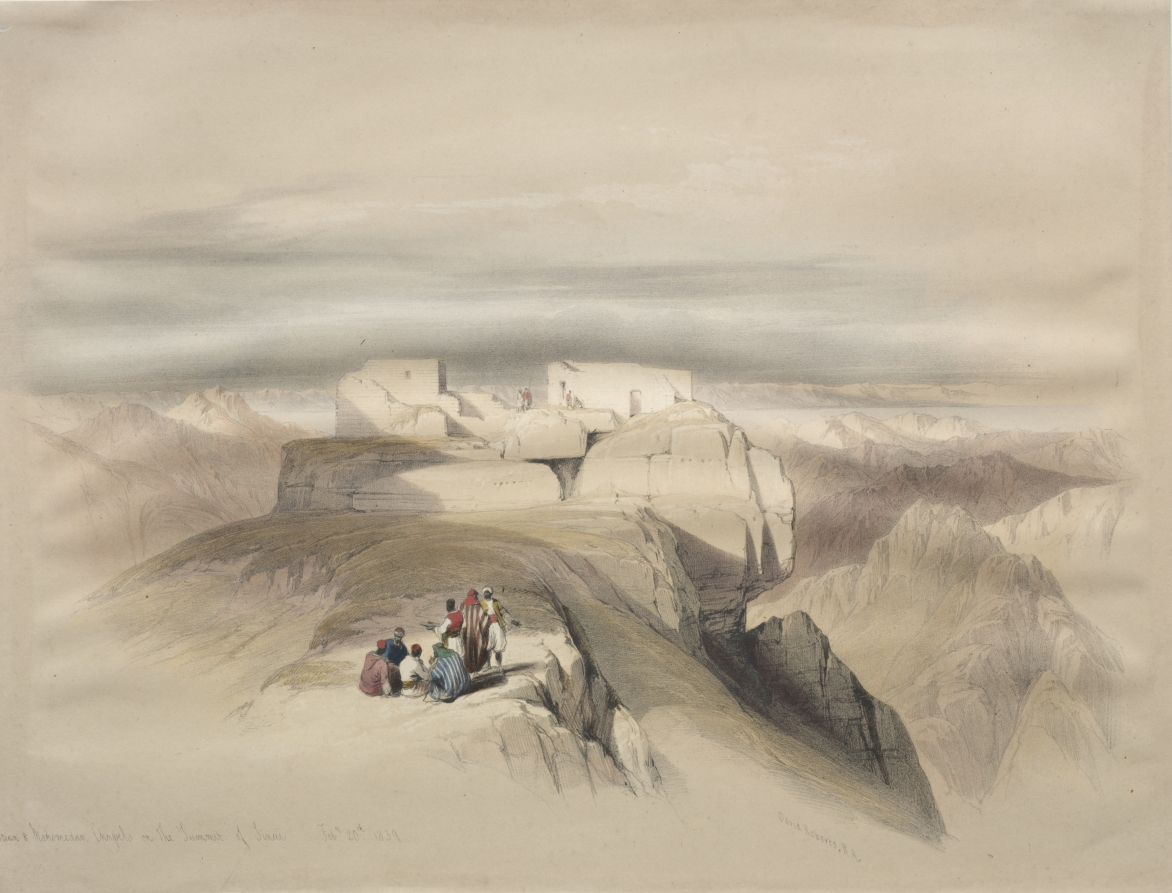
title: Christian and Mahomedan Chapels on the Summit of Sinai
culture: England, 19th century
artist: David Roberts (Scottish, 1796–1864)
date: 1839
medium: color lithograph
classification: Print